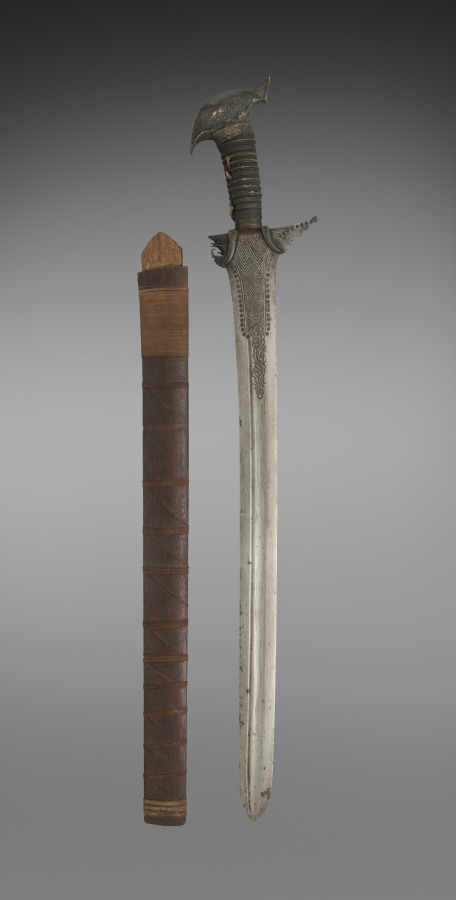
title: Sword (Kalis or Sundang) and scabbard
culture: Philippines, Mindanao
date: before 1916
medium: Blade: metal with brass inlay; grip: cord; pommel: silver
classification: Arms and Armor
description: This sword has a straight kalis blade with squared shoulders, a long central fuller, and an engraved chevron-and-scroll pattern above the guard. The wing guards at the base of the blade are held in place by two asang-asang (fish gill) clamps. The hilt terminates with a silver cockatoo (kakatua)-shaped pommel. Silver pommels of this type are associated with elite datu owners.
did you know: Silver pommels are uncommon in Philippine swords, as silver had to be sourced from abroad (typically China).